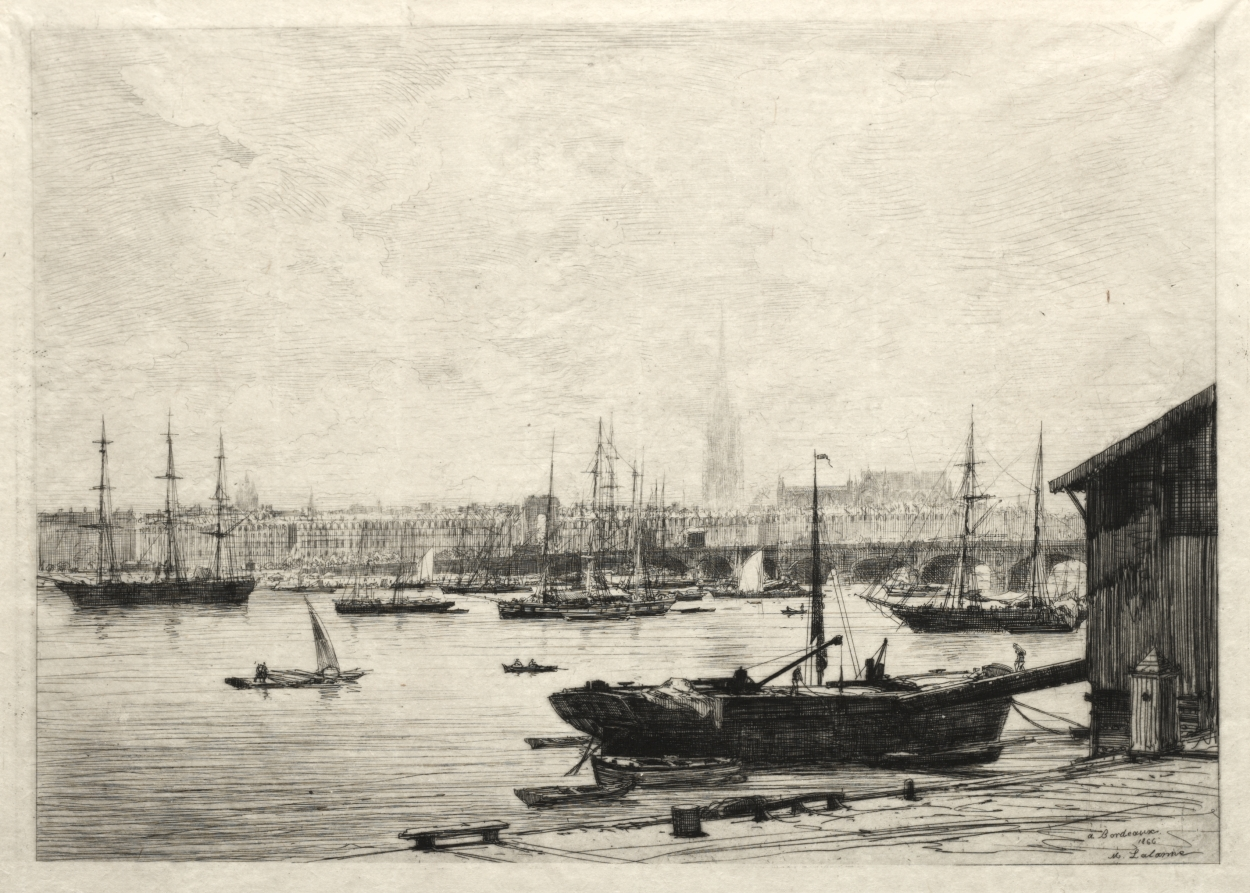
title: Bordeaux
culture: France, 19th century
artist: Maxime Lalanne (French, 1827–1886)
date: 1866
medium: etching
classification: Print